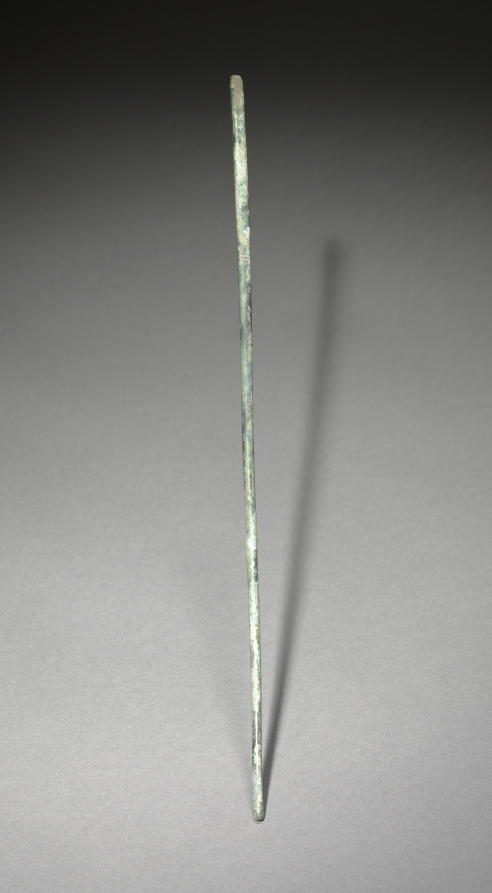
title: Chopstick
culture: Korea, Goryeo dynasty (918–1392)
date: 918–1392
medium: bronze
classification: Metalwork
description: In Korea, chopsticks made of metal such as brass, silver, and gold were excavated from ancient tombs and ruins dated to the 6th century at the earliest. Burial goods often include utilitarian objects such as table wares and utensils because the dead were believed to need them in the afterlife.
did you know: In contrast to the Chinese and Japanese, Koreans still prefer metal chopsticks (stainless steel and brass) to wooden ones.